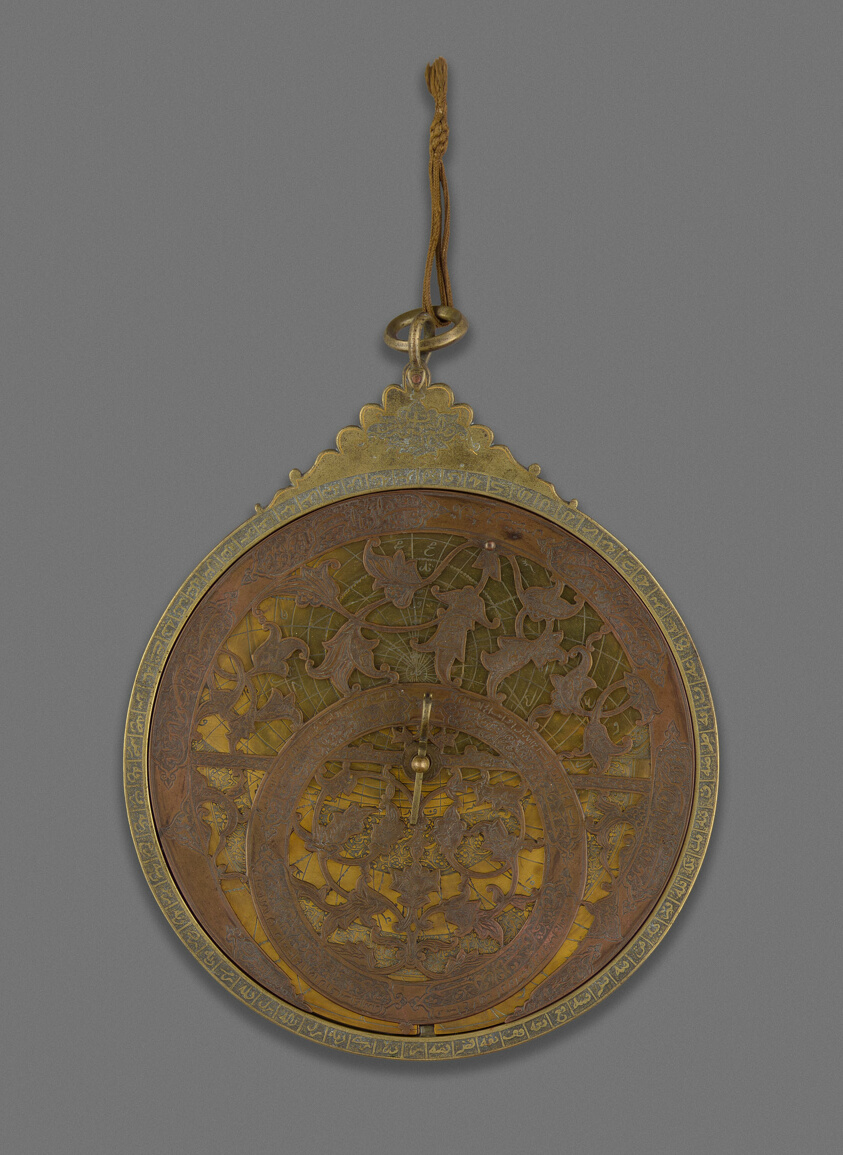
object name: Metalwork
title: Astrolabe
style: Islamic (culture or style)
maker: Iran; Isfahan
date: Qajar dynasty (1786–1925), Late 18th century with later additions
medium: Brass with pierced and engraved decoration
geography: Iran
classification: brass; metalwork; asian art; astronomical instruments; decorative arts